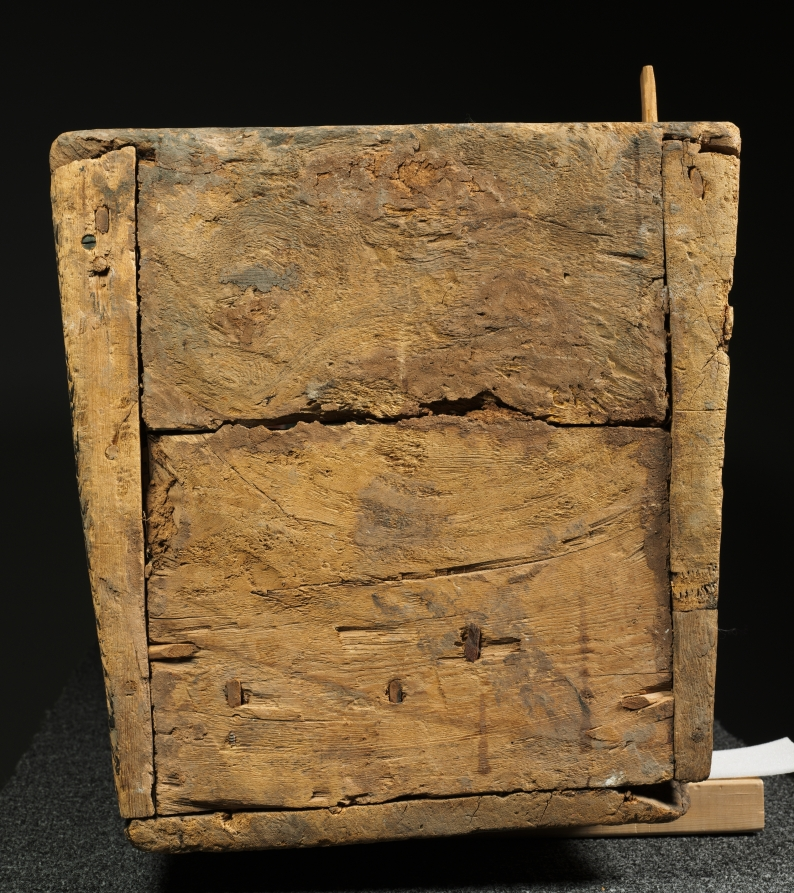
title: Coffin of Bakenmut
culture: Egypt, Thebes, Third Intermediate (1069–715 BCE), Dynasties 21–22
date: c. 1000–900 BCE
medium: gessoed and painted sycamore fig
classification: Funerary Equipment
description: The coffin of Bakenmut is one of the finest examples of painted wooden coffins made for the priests of Amen and their families at Thebes during Dynasty 21 and early Dynasty 22. The pharaohs of this time were no longer buried in the Valley of the Kings, but instead built tombs in the Delta, far to the north, where they resided. Security was lax in the Theban necropolis. The coffins and funerary goods of the wealthy citizens of Thebes were placed in unmarked and undecorated family tombs cut into the cliffs on the west bank of the Nile. All the care and detail that in more prosperous times were devoted to the decoration of the tomb chapel were now lavished on the elaborately painted coffins. Every available surface is crowded with religious scenes, images of funerary gods and goddesses, protective spells, and magical symbols. The deceased appears mummiform. An elaborate floral collar entirely covers the upper body, exposing only the separately attached hands (now lost). A pair of red "mummy braces" are crossed over the chest, their point of intersection marked by a winged sun disk. The lower body is covered with tiny figures modeled in gesso against a yellow background, which gives the effect of gold inlaid with glass or semiprecious stone. The decoration on the interior features two deified dead kings of Dynasty 18. Although these rulers had lived centuries before, memory of their greatness was still very much alive. The main scene near the top depicts Tuthmosis III, the great military pharaoh, who lived 500 years before Bakenmut. Posed as a mummy, the ruler wears a brilliant feathered garment enfolding him with falcon’s wings. The scene below features back-to-back seated images of Amenhotep I, regarded as the patron of the Theban cemetery and worshiped as a local god there.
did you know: Originally another smaller coffin was placed inside this outer coffin and in that the deceased with a mummy board would have rested.